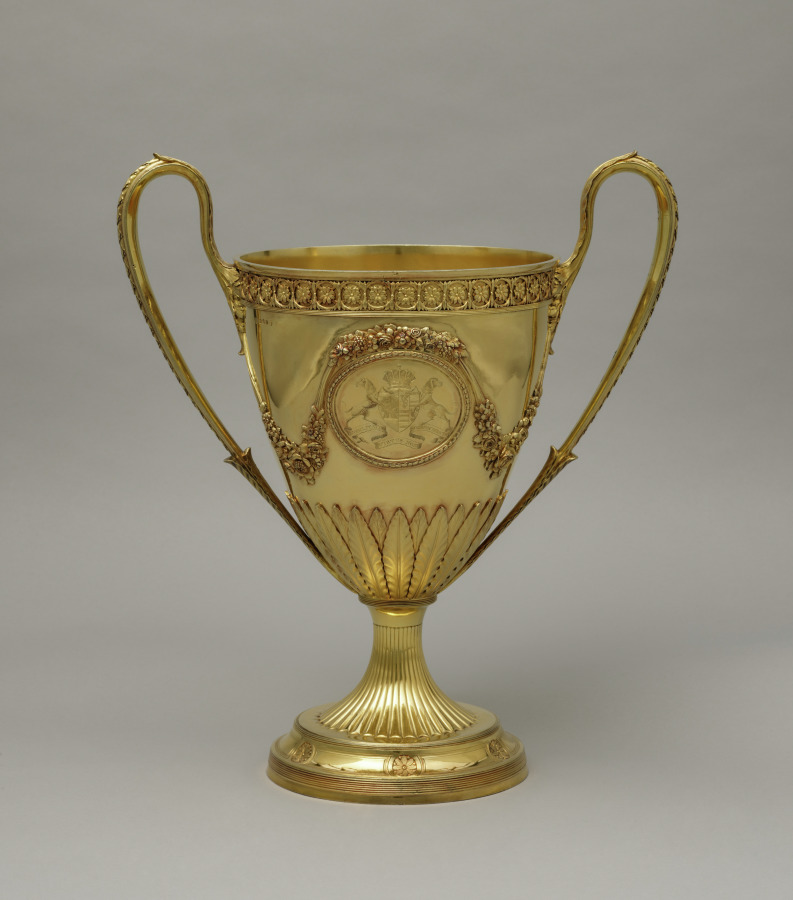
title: Trophy Cup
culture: England, 18th century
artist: Peter Bateman (British, 1740–1825)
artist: Anne Bateman (British, 1748–1813)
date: 1792–93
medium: silver gilt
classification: Silver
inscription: Engraved arms: Grosvenor impaling Egerton and Grey (arms of Robert Grosvenor (1767–1845), the first Marquess of Westminster, and Lady Eleanor Egerton (1770–1846))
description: Silver fulfilled a prominent role in projecting wealth, status, power, and ritual in British life during the 1600s and 1700s. Elaborate forms such as this trophy, with its swags of flowers, neoclassical rosettes, and acanthus spears, not only represented wealth in its sheer silver weight but also provided royal and aristocratic owners a surface for displaying engraved coats of arms. Engraved on one side of this trophy cup can be found the arms of Robert Grosvenor (1767–1845), the first Marquess of Westminster, and Lady Eleanor Egerton (1770–1846), whom he married in 1794, a year after the trophy’s completion. The other side depicts preparations for a horserace, the most culturally significant leisure activity enjoyed by aristocratic families in the 1700s. Grosvenor owned a number of famous horses and was likely awarded this trophy following a successful race.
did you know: This trophy cup has a lid. See cover record.